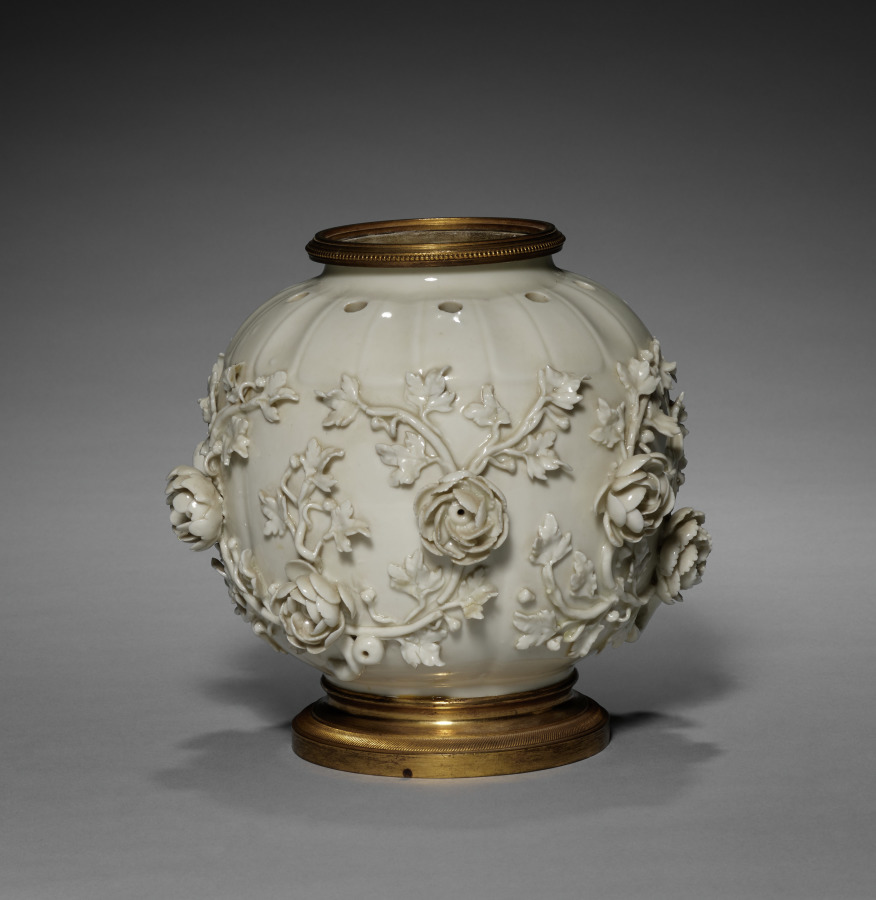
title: Potpourri Vase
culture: France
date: 1860–80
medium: blanc-de-chine porcelain; gilt bronze mount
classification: Ceramic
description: This vase--part of a pair of covered vases--was created to contain potpourri, a mixture of flowers, herbs, and spices emitting ambient fragrance. This specific function offered a particularly fertile ground for the development of French porcelain from the mid-1700s, as manufactories experimented with forms, surface ornamentations, and placement of perforations. Produced by the firm of Edmé Samson in the 1800s, the vases pay homage to this history. While using updated technique and material, as well as more exuberant decorations, these vases draw upon designs by earlier innovators such as the Saint-Cloud manufactory.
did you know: Potpourri vases always have holes in the top to let the scent of dried spices and flowers contained within freshen the air around them.